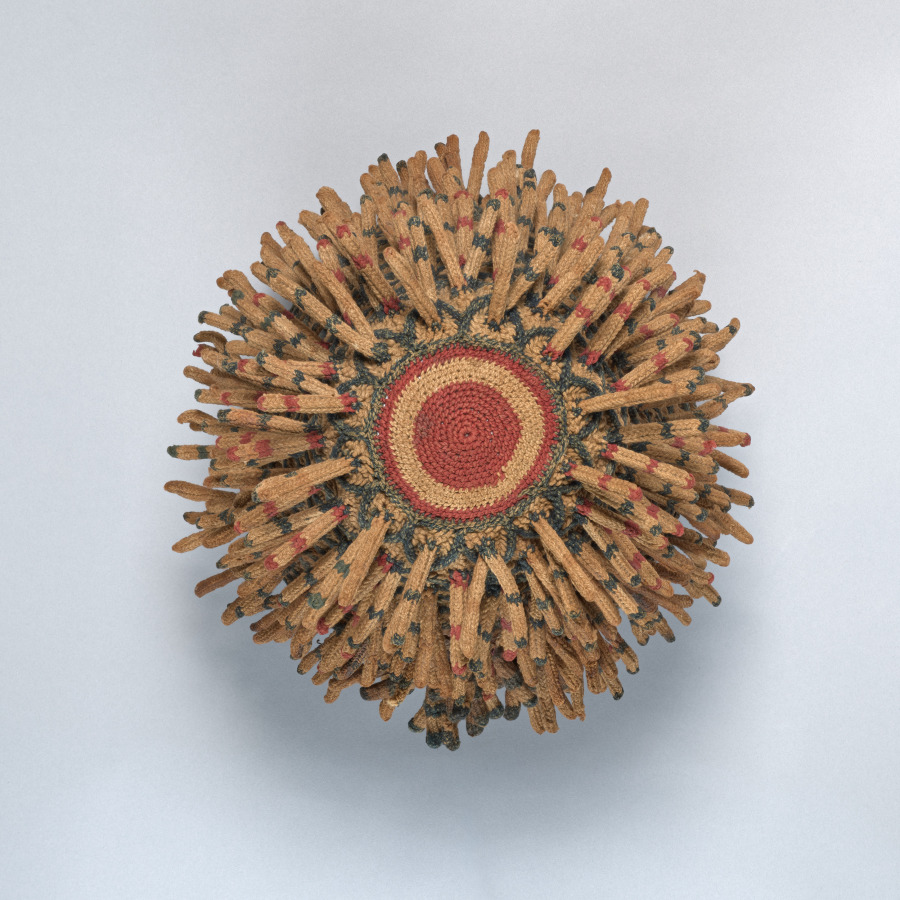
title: Prestige Headdress (Ashetu or shüötu)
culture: Bamum style, unknown maker, Grassfields region, Cameroon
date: 1900–1950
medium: cotton, dye (including indigo)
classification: Textile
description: The bristle-like surface of this man’s prestige headdress is dyed with indigo or a red pigment. Below, a diamond pattern evokes another royal symbol, the leopard. The projections are reinforced with small pieces of wood. Such extensions are seen on prestige headgear represented in wood in sculptures and in colored pencil on drawings in the collection.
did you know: Titled men still wear such prestigious adornment today.